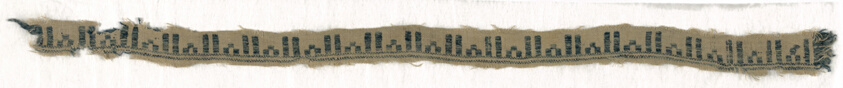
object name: Textile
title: Fragment (Border)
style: fatimid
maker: Egypt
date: Fatimid period (969–1171)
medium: Linen, compound weave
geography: Egypt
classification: textile; weaving